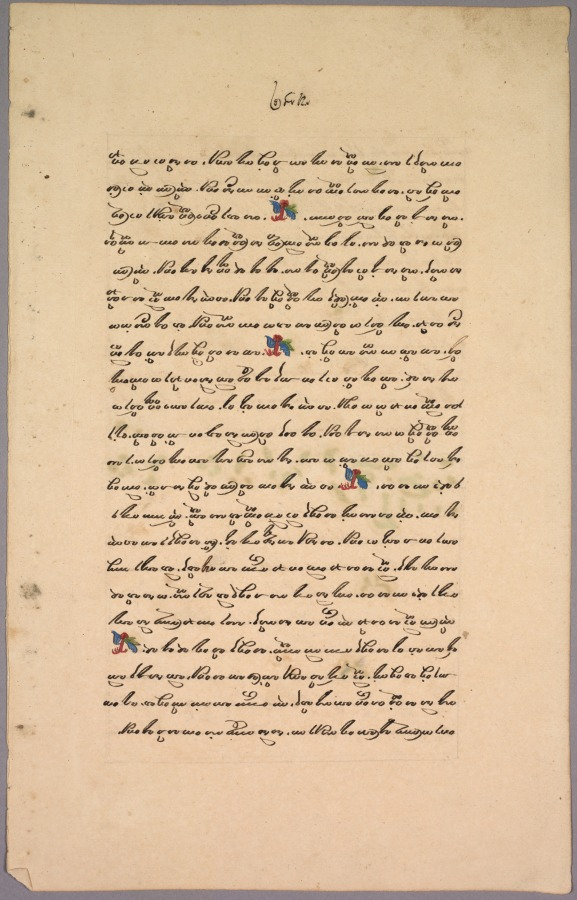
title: Page from Ramayana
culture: Java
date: 1800s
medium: ink on paper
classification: Manuscript